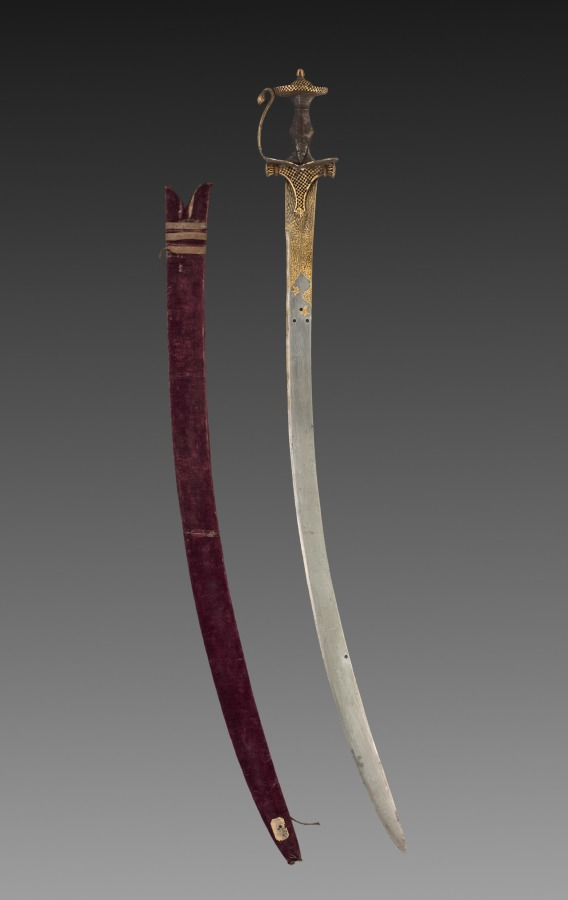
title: Tulwar sword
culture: India, probably Deccan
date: 1700s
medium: Iron hilt with gold; steel blade with gold; wood scabbard with velvet and metallic thread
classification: Arms and Armor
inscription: Help [comes] from God, and Victory is imminent.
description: This long curved sword and scabbard are of the kind used and worn by Mughal nobility, as seen often in paintings. The openwork hilt is a characteristic of swords from the southern Indian region known as the Deccan. By the end of the 1500s, the Mughals began making regular incursions into the Deccan as they attempted to expand their empire, increasing the exchange of art forms. Repeated four times, twice on one side of the blade and twice on the other in gold inlay, is the same line from the Qur'an 61:13: “Help [comes] from God, and Victory is imminent.” This is a popular inscription on daggers, banners, and other instruments of war, as it reassures the combatants that God is on their side, and therefore they can in good faith expect a speedy victory if they fight valiantly.